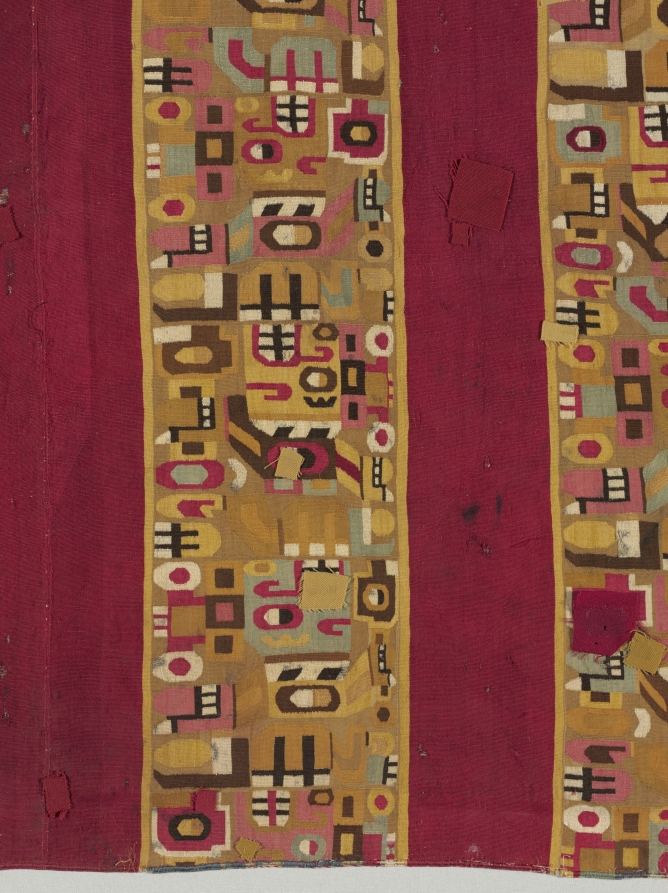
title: Tunic with Sacrificer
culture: South America, Peru, Central Andes, Middle Horizon, Wari people, 7th-11th century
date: 600–1000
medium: camelid-fiber, cotton; tapestry weave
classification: Textile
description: An extremely abstract supernatural sacrifice repeats in different colors and orientations across the body of this tunic, which was shortened on one side in antiquity. Look for the toothy black-and-white mouth in the sacrificer's upward-gazing head; other facial features include a button nose and a vertically divided eye. The figure holds the L-shaped haft of an axe behind its back and, at the front of its body, a short staff with a severed, upside-down human head on the top.